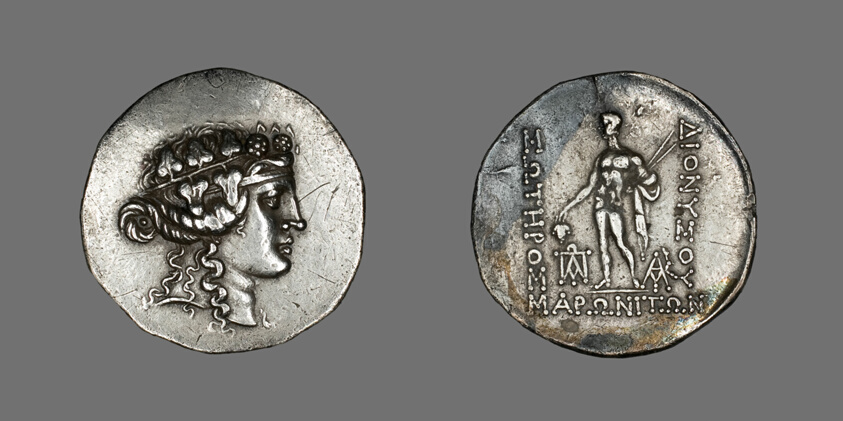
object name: Coin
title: Tetradrachm (Coin) Depicting the God Dionysos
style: greek, ancient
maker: Greek; minted in Maroneia, Thrace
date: mid–2nd century BCE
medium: Silver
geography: Greece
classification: coin; ancient art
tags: mythology, goddesses, gods (deities)